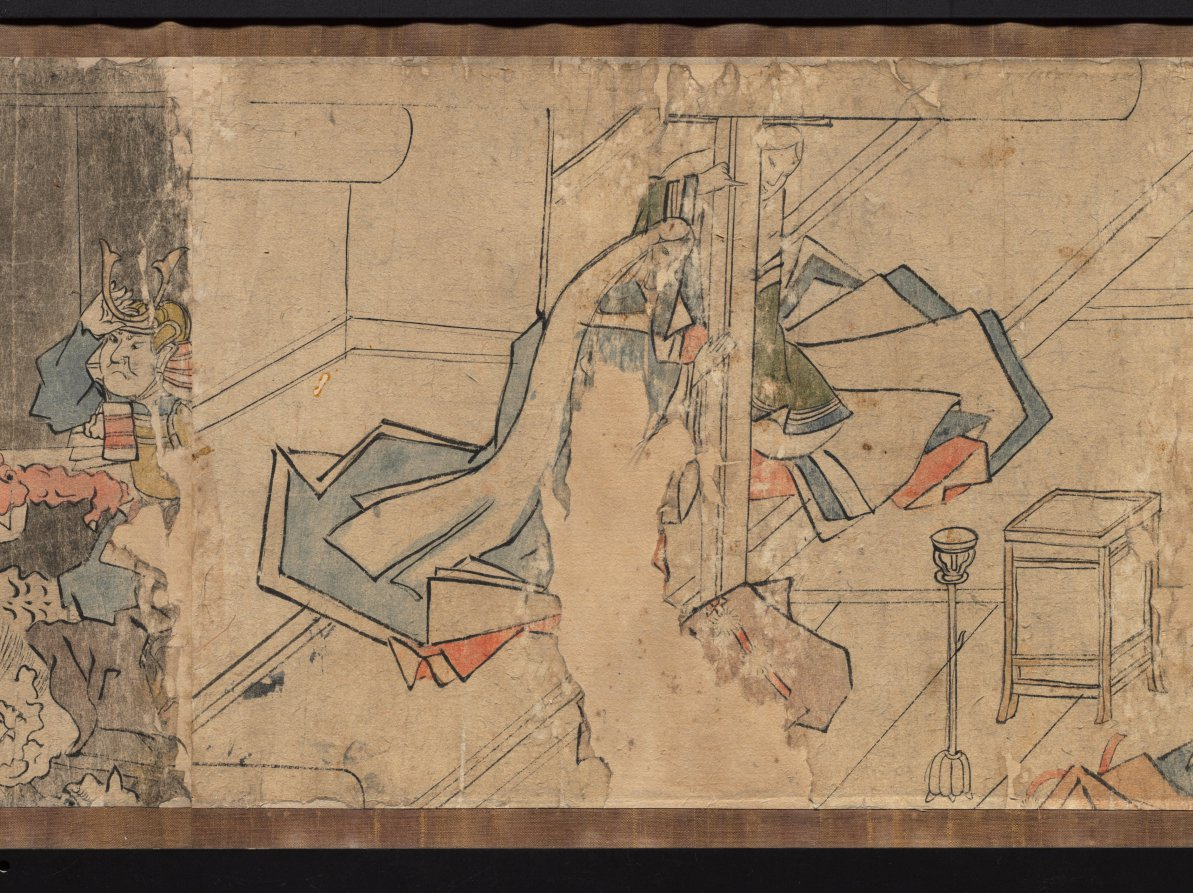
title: Oeyama Engi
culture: Japan, Edo period (1615–1868)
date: 1615–1868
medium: one of a pair of handscrolls; ink and color on paper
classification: Painting